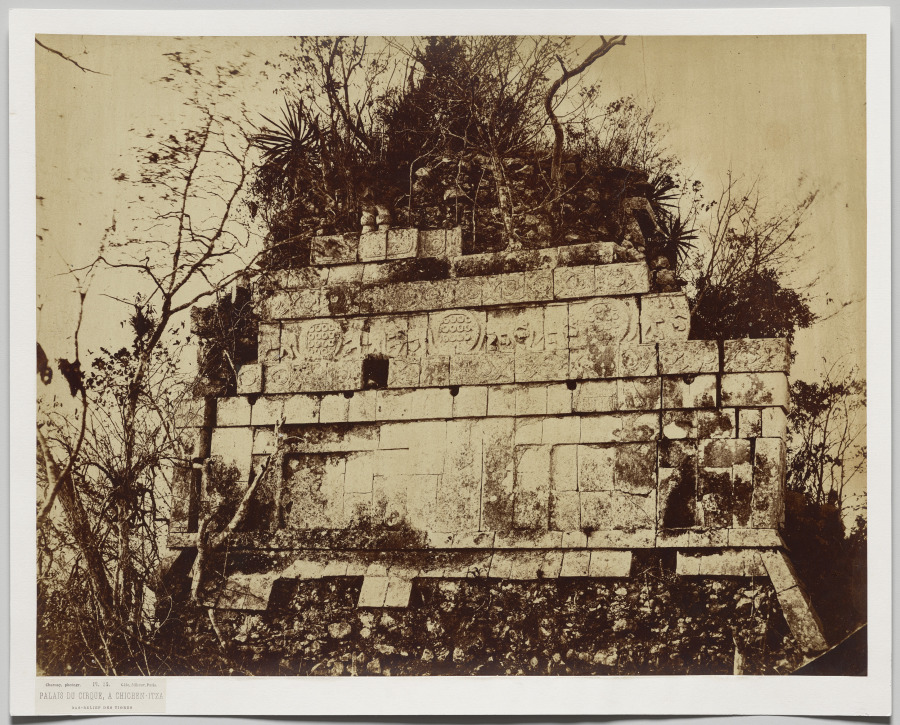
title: Palace of the Circus at Chicen-Itza (bas relief of tigers)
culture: France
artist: Claude-Joseph-Désiré Charnay (French, 1828–1915)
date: c. 1860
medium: albumen print from collodion negative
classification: Photograph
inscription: Imprinted on paper label adhered to recto, lower left: "Charnay, photogr. Pl. 34. Gide, éditeur, Paris./PALAIS DU CIRQUE, A CHICHEN-ITZA/Bas-relief des Tigres"